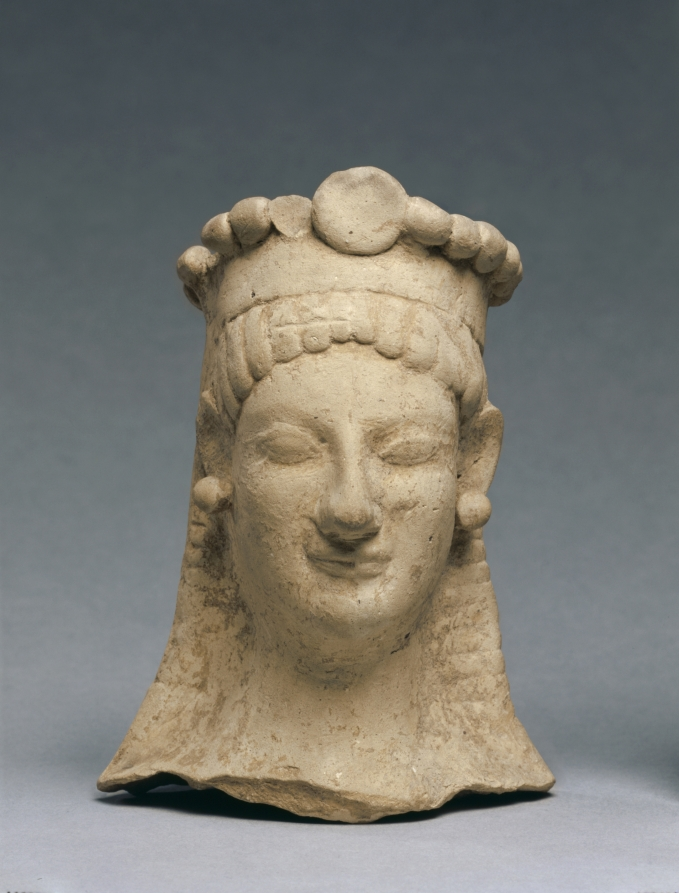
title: Woman's Head with Crown and Earrings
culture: Greece, Sicily(?)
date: 600–475 BCE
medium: terracotta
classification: Sculpture